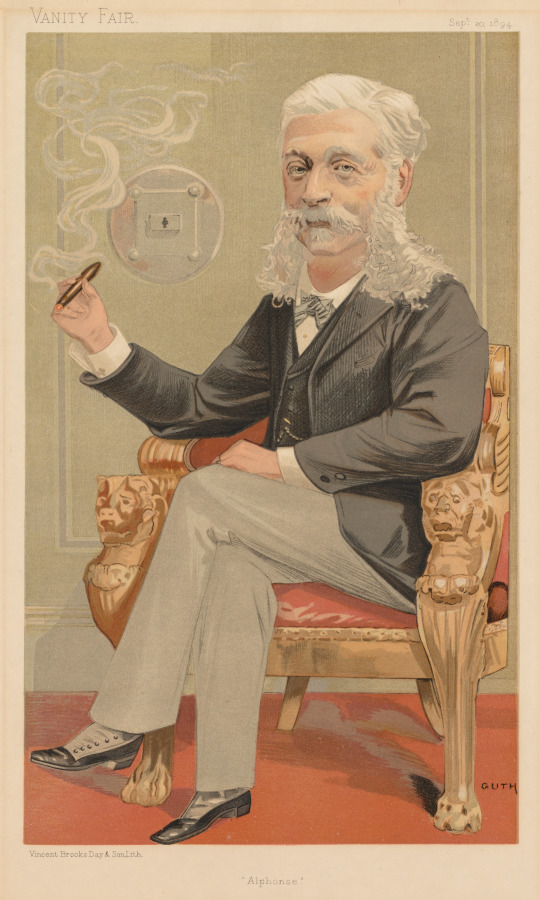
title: Alphonse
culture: Italy, 20th century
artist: Julius Mendes Price (British, 1857-1924)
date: 1894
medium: color lithograph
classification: Print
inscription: artist monogram, "Guth" in stone Lower left, in graphite: The Curies